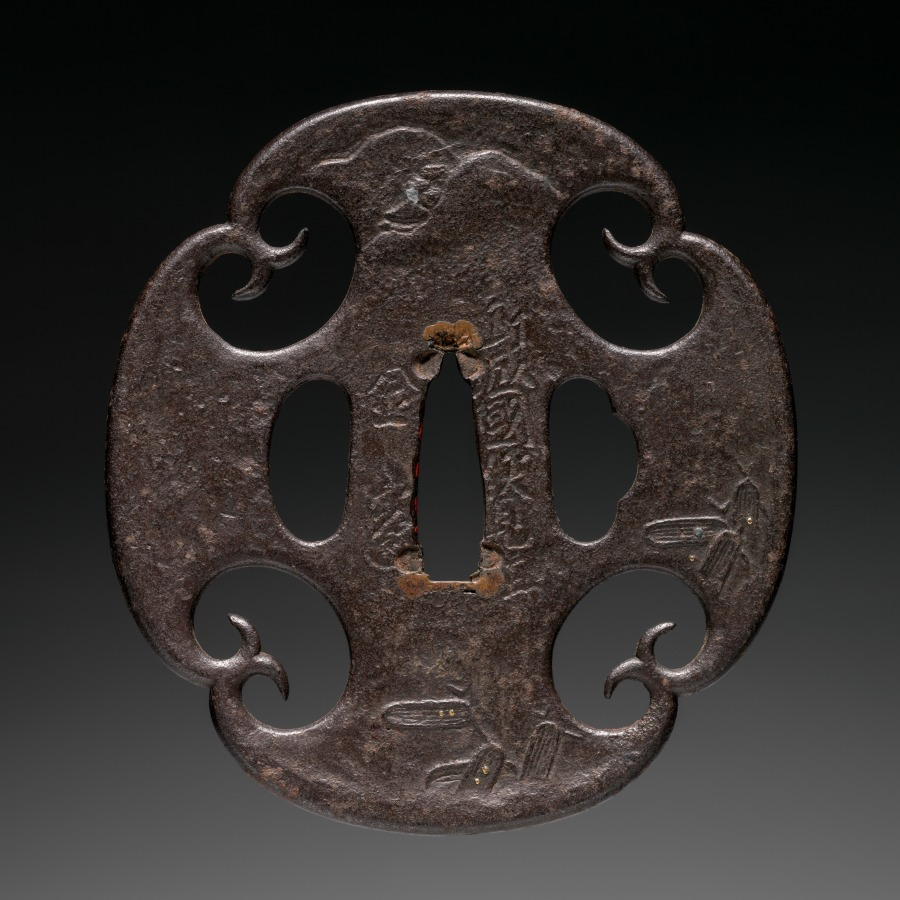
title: Sword Guard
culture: Japan, Edo period (1615–1868)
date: 1600s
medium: iron (Kaneie type)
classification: Arms and Armor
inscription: signed "Kaneiye, residing at Fushimi, Yamashiro province."